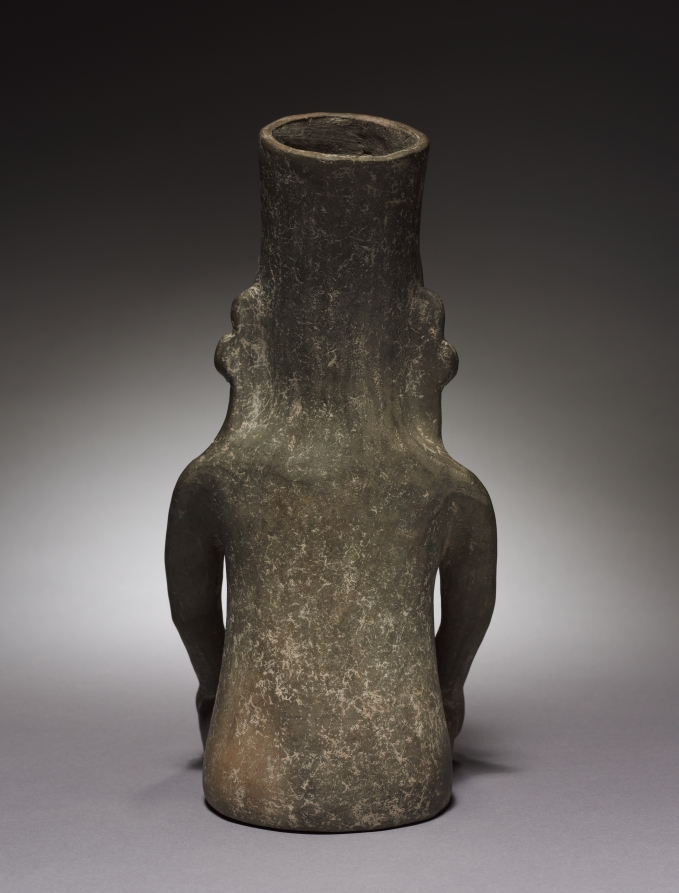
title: Urn Figure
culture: Mexico, Oaxaca, Zapotec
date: c. 150 BCE–200 CE (thermoluminescence date, 60 BCE–642 CE)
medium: earthenware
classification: Sculpture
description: This simply posed and costumed urn figure represents a goddess, or perhaps an ancestress. Early Zapotec ceramic art has a spare elegance that contrasts strongly with the florid ornamentation of later works.